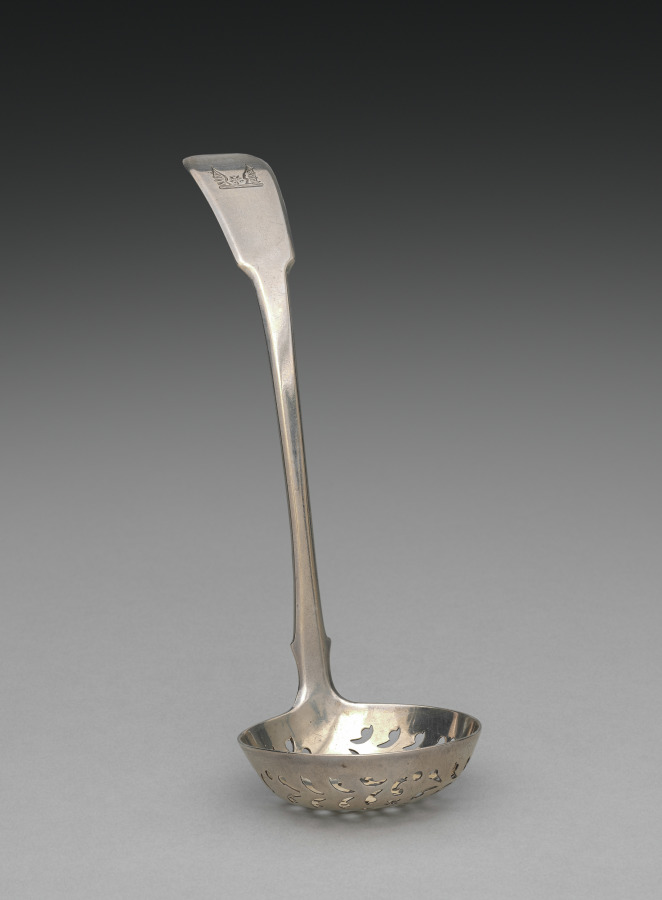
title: Sugar Sifter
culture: England, London, early 19th Century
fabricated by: John Beldon (British)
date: 1805–1806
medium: silver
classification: Silver